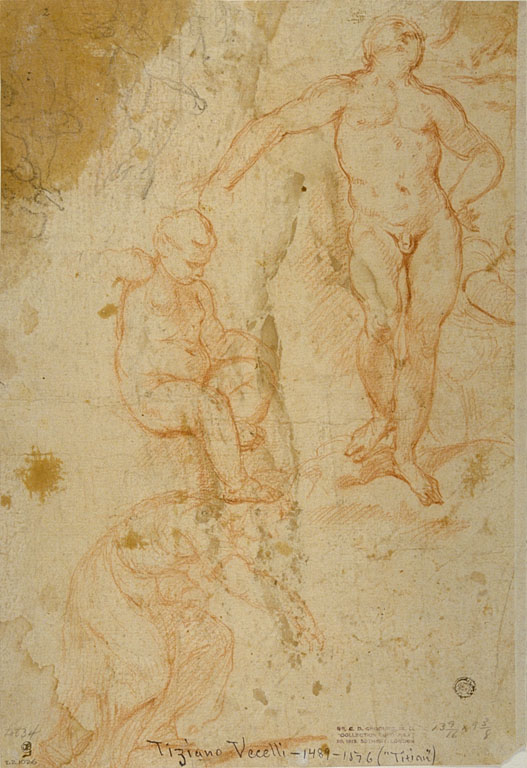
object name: Drawing and Watercolor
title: Écorché before Landscape (recto); Sketches of Standing Male Nude, Seated Child, Stooping Woman (verso)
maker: After Jan Stephan van Calcar (Netherlandish,1499-1546/50); or after Tiziano Vecellio, called Titian (Italian, c. 1488-1576)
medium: Pen and brown ink, with brush and brown and gray wash (recto), and red and black chalk (verso) on cream laid paper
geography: Italy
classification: ink with wash; drawings (visual works); prints and drawing